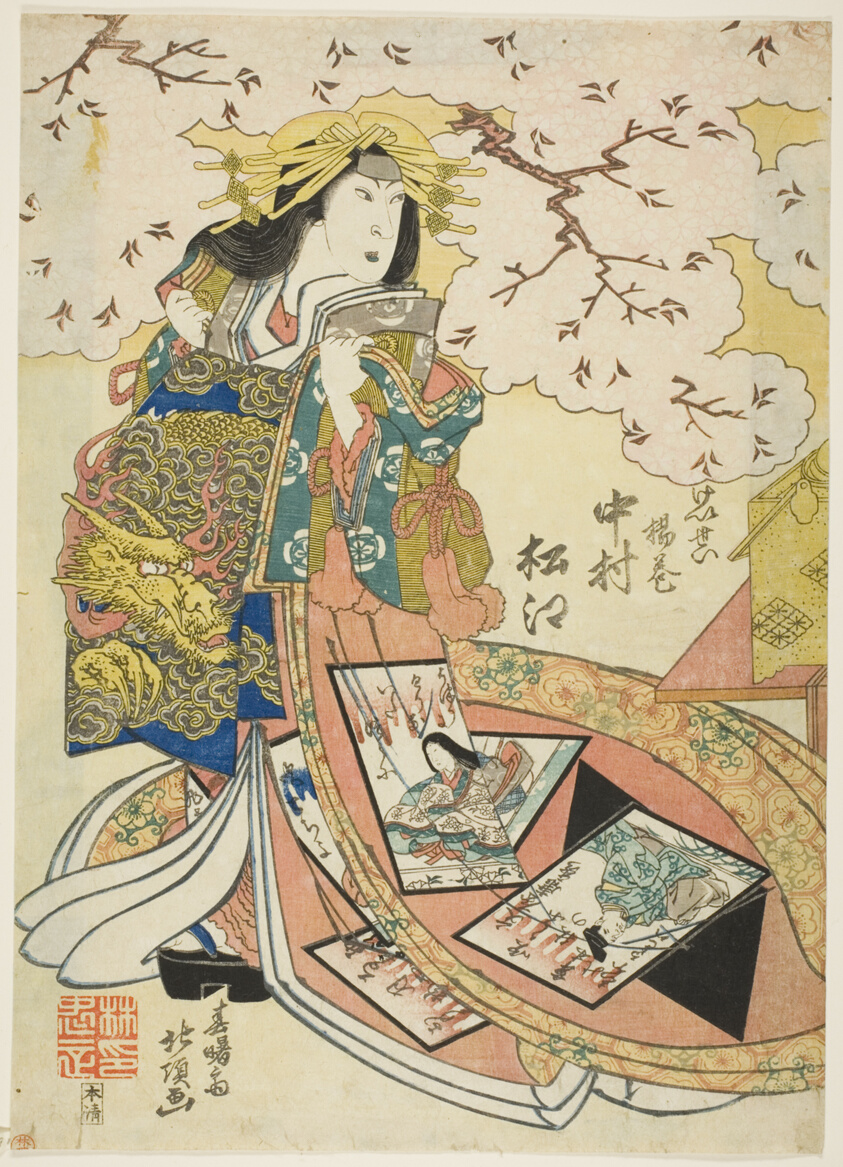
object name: Print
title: The Actor Nakamura Matsue III as Keisei Agemaki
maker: Shunshosai Hokucho (Japanese, active 1822–30)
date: early 19th century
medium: Color woodblock print; oban, part of multisheet composition (another sheet: 1968.393)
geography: Japan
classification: print; asian art